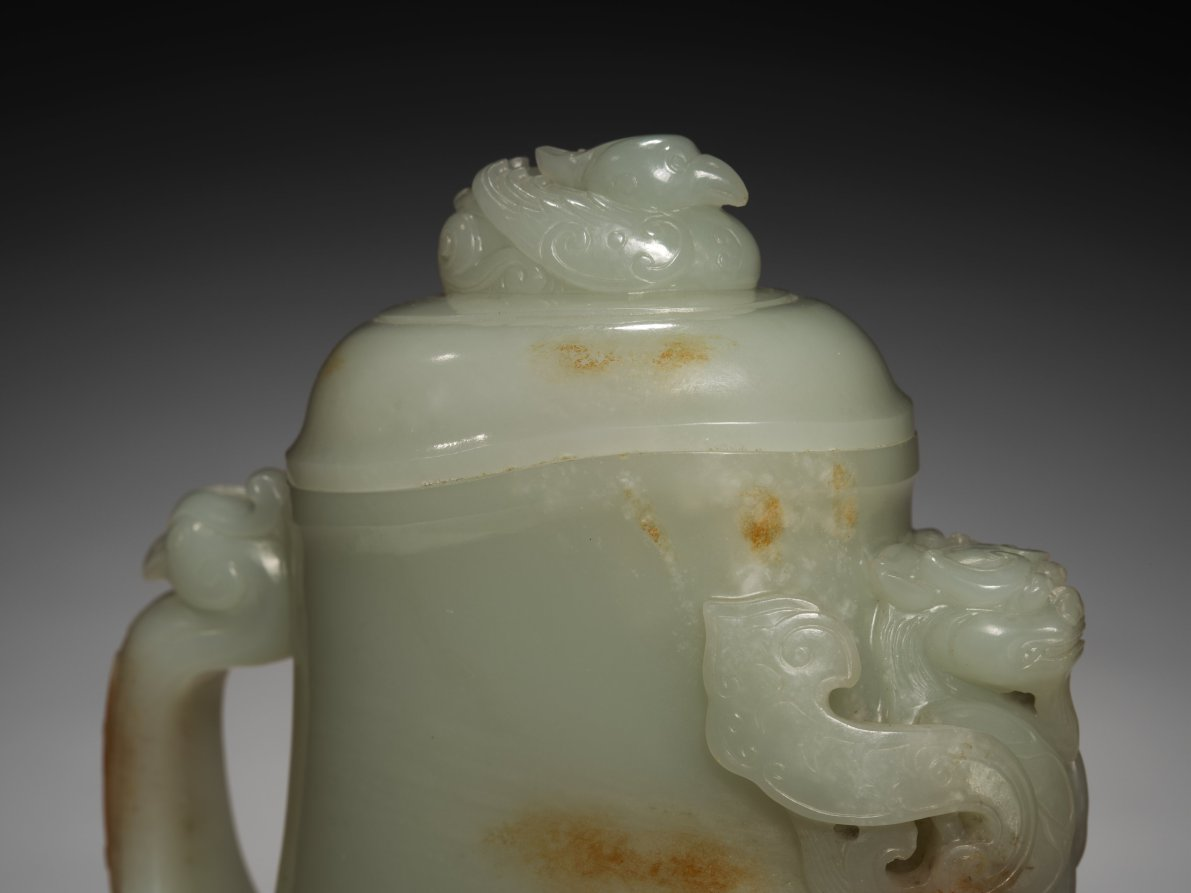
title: Pitcher (Gong) with Dragon and Bird-Headed Handle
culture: China, Qing dynasty (1644–1911)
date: 1700s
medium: pale greenish-white jade with brown markings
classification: Jade